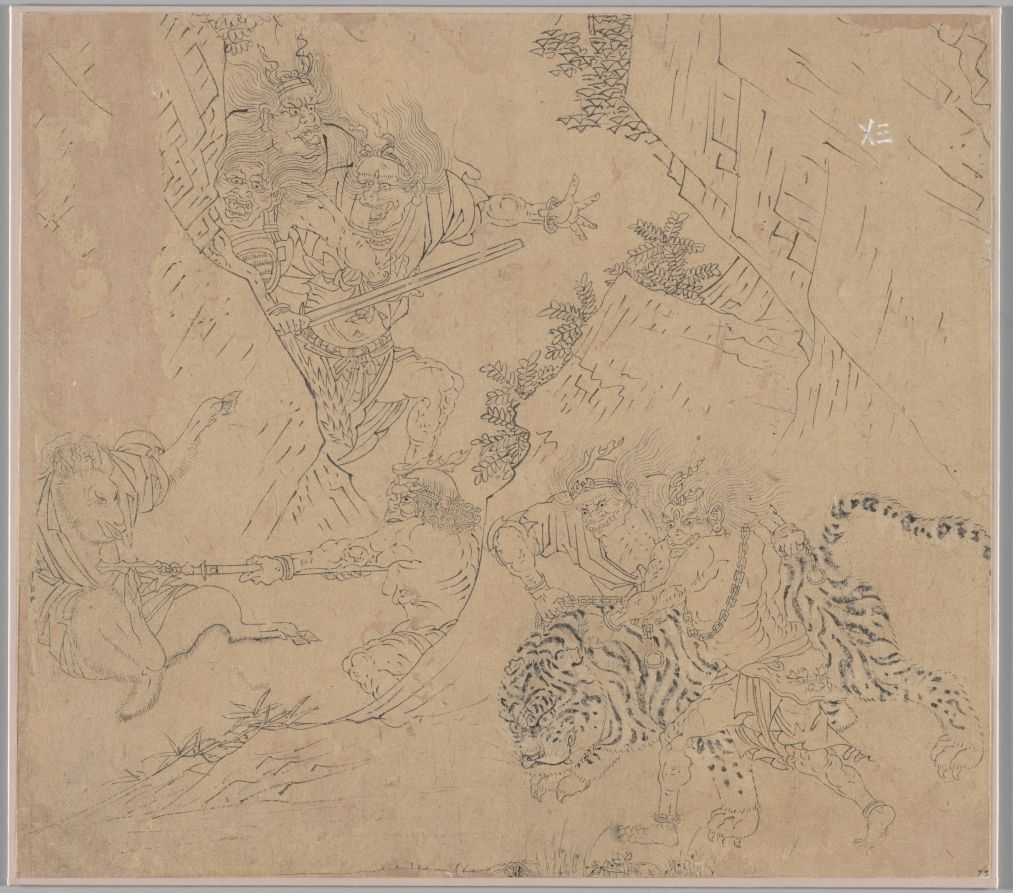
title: Album of Daoist and Buddhist Themes: Search the Mountain: Leaf 43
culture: China, Southern Song dynasty (1127-1279)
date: 1200s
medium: Album, ink on paper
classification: Painting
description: This leaf and the one nearby belongs to a group of sketches with the theme “Clearing the Mountains” (soushan tu). The textual basis has long been lost; only the paintings survive. Here, fearsome divine soldiers fight against evil spirits depicted as animals and human-like creatures in mountains and forests. At the lower left, a soldier attacks a ram. To the right, two soldiers attempt to subdue a tiger. Three soldiers (one wielding a sword) emerge from an opening in the cliffs.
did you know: Soldiers charging through crevices confront a ram with a spear and put a tiger in chains.